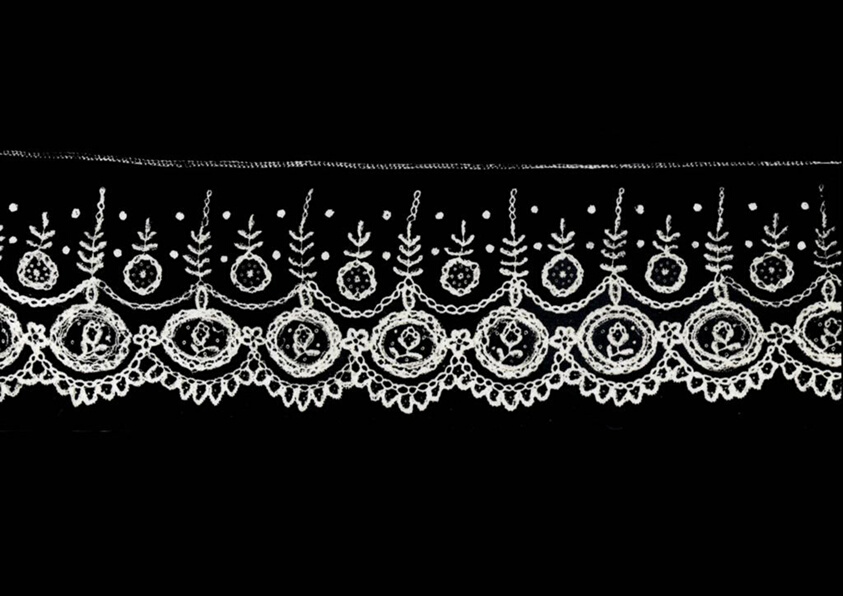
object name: Textile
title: Border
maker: Belgium, Brussels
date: 1850/75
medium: Cotton and linen, mixed lace known as "Brussels application lace:" bobbin and needle laces applied to machine-made net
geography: Brussels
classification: textile; lace - mixed